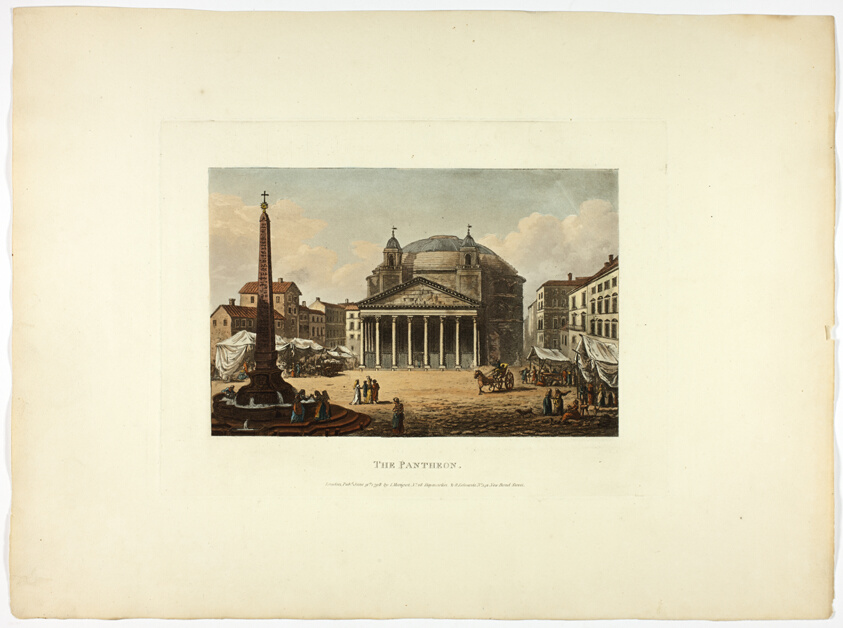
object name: Print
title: The Pantheon, plate twenty-six from the Ruins of Rome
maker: M. Dubourg, (English, active 1786-1838); published by J. Merigot (Italian, Unknown)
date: published June 9, 1798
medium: Hand-colored aquatint on paper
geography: England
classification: aquatint; print; prints and drawing